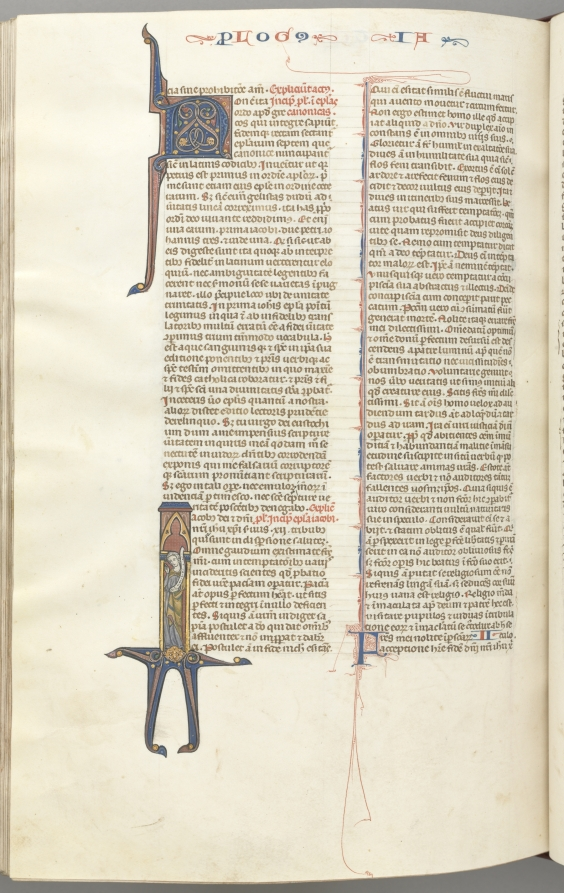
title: Fol. 476v, James, historiated initial I, James standing with a scroll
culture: Southern France, Toulouse(?), 13th century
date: c. 1275–1300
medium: ink, tempera and gold on vellum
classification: Bound Volume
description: Biblical manuscripts were highly prized and important possessions of churches, monasteries, cathedral schools, and universities throughout medieval Europe. The biblical texts were known as the vulgate, the translations made by Saint Jerome in the fourth century from Hebrew and Greek into Latin, which became the definitive and official Latin version of the Roman Church. In the 13th century, the bible was, for the first time, produced as a single volume with an officially sanctioned sequence to its books and chapters as illustrated by this example. The very extensive decoration of this bible is arranged hierarchically to indicate the relative importance of the various texts so that full or almost full-page initials mark the openings of the first prologue, Genesis, and the first Gospel; historiated initials mark the beginning of each book and illuminated initials mark the Prologues.